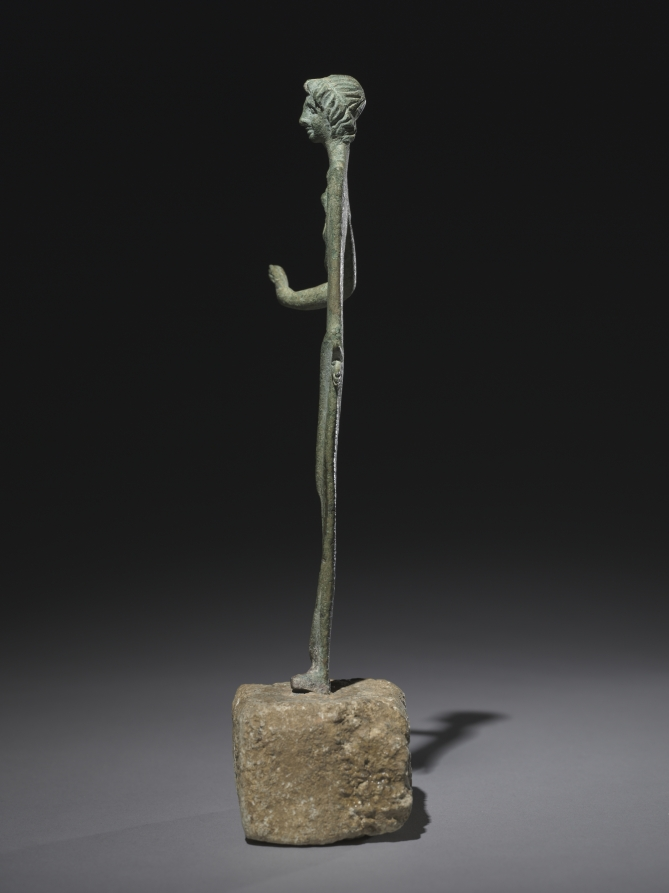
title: Male Votive Figure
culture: Etruscan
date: 300s BCE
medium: bronze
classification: Sculpture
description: This Etruscan votive figure is posed with his hands turned to expose his palms, one near his hip, the other projecting laterally. With the exception of the fully three-dimensional head and the extended right arm and hand, the side profile of this figure is shockingly flat. The tall man’s back is not only extremely thin but also an almost perfectly vertical column. Other examples of this votive figure type are even more elongated, and some hold small cups or libation dishes, as if making offerings. Some scholars have suggested that these votive figures may represent shadows due to their extreme height and relative lack of depth, while others have seen connections to much older traditions of relatively flat cult images, whether of wood or metal.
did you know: This bronze statuette was cast in a single piece.